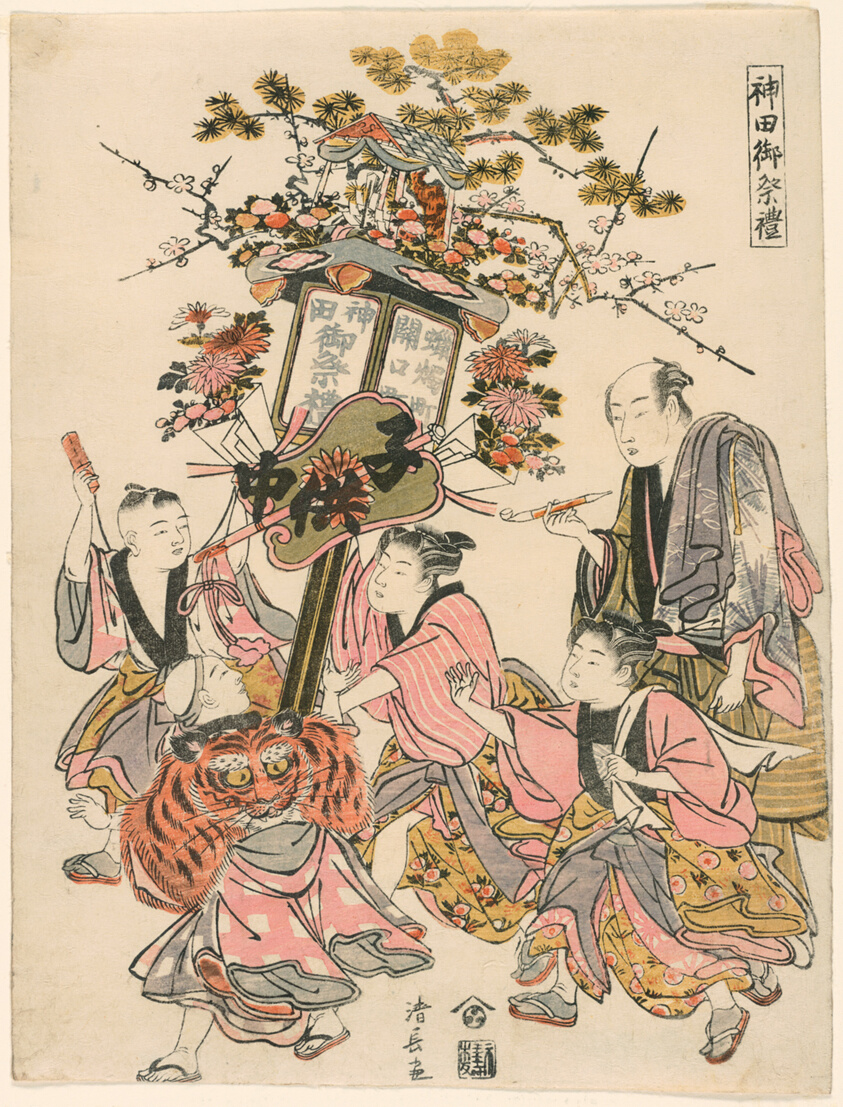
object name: Print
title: Carrying a Lantern Decorated with a Pavilion, Gohei, Flowers, and Fan (Sekiguchi-cho Rosoku-cho no banto), from the series "The Festival of the Kanda Shrine (Kanda go-sairei)"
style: Japanese (culture or style)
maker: Torii Kiyonaga (Japanese, 1752-1815)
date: 1779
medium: Color woodblock print; chuban, nishiki-e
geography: Japan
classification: woodblock print; print; asian art